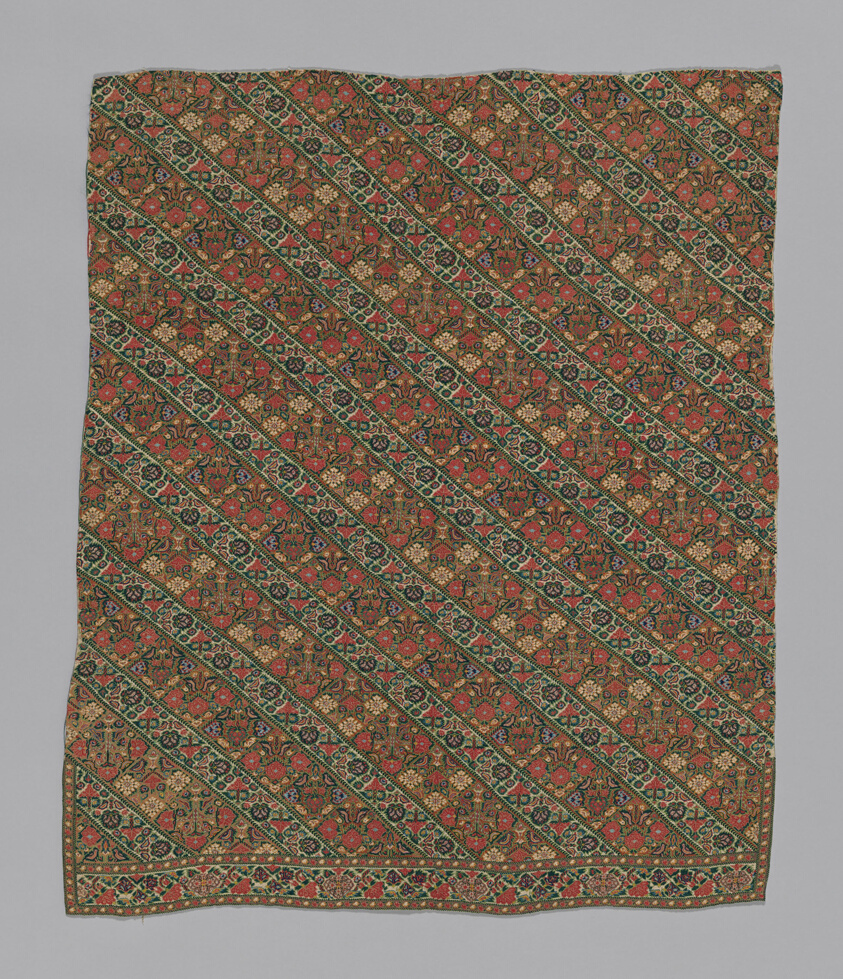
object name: Costume and Accessories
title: Panel (From Woman's Trousers)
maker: Iran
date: 19th century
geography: Iran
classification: textile; needlework (visual works); costume